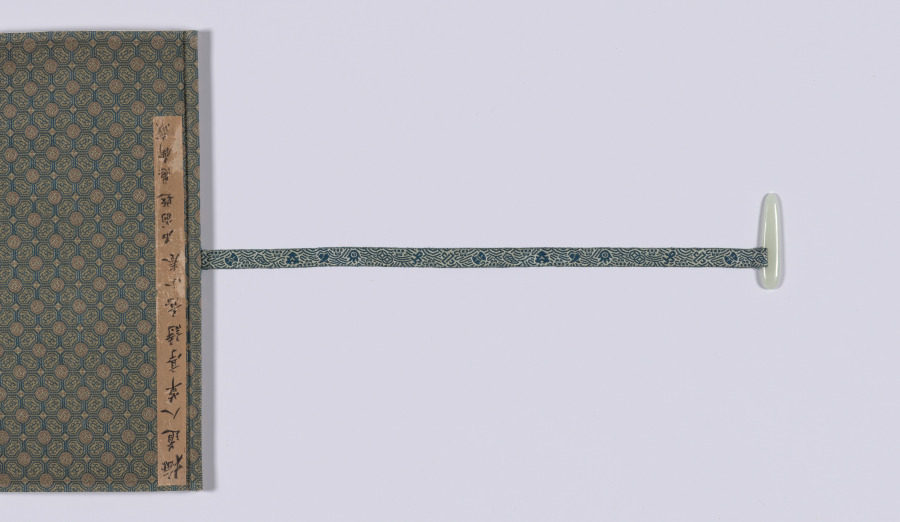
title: Poetic Feeling in a Thatched Pavilion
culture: China, Yuan dynasty (1271-1368)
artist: Wu Zhen (Chinese, 1280–1354)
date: 1347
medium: handscroll; ink on paper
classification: Painting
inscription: 依村構草亭，端方意匠宏。 林深禽鳥樂，塵遠竹松輕。 泉石俱延賞，琴書悅性情。 何當謝凡近，任適慰平生。 至正七年丁亥冬十月，為元澤戲作草亭詩意。梅沙彌書 [印]楳華盦; 嘉興吳鎮仲圭書畫記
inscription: 我愛梅花翁，巨老傳心印。 脩此水墨缘，種種得蒼潤。 樹石墮筆鋒，造化不能吝。 而今橡林下，我願執掃汛。 後學沈周 [印]启南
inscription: Colophon by Chen Rentao (1952): 予求梅道人畫二十年不可得。所見多膺鼎，即故宮所藏山水數軸都不可靠。傳世真迹，惟《漁父圖》、《嘉禾八景》與此《草亭詩意》而已。壬辰十月十四日余大病初愈，居家休養，研山師忽持此圖相贈。展卷披覽，頓覺精神沛振，如服僊藥。同日又得宋拓柳公權《神策軍紀聖德碑》，及群玉堂藏《真草書千(字)文》，皆海內孤本。一日得數寶，欣喜何如，書以志幸。 陳仁濤識 [印]陳氏仁濤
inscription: Colophon by Chen Rentao: 此圖作於至正七年丁亥，時年六十八，盖其晚年神品也。 濤又識 [印]陳仁濤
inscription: Title on frontispiece by Li Dongyang 李東陽 (1447-1516).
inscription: 33 additional seals: 1 seal of Li Chao-heng 李肇亨 (1592-1664)：檇李李肇亨書畫記; 9 seals of Liang Qingbiao 梁清標 (1620-1691): 蒼巖子、蕉林、蕉林梁氏書畫之印、蕉林秘玩、蕉林書屋、蕉林玉立氏圖書、棠邨 (appears twice)、棠邨審定; 1 seal of Wang Yirong (1845-1900): 懿榮; 3 seal of Li Yanshan (1898-1961): 雙銕笛樓 (appears twice)、硯山心賞; 12 seals of Chen Rentao 陳仁濤（1906-1968）：陳氏仁濤、陳仁濤珍藏印、金匱寶藏·陳氏仁濤 (appears three times)、金匱秘笈、金匱室、金匱室精鑒璽 (appears twice)、金匱室主、金匱神品、仁濤奇緣; 1 seal: 崐溟居士; 1 seal: 林止在㭯生圖書印; 3 seals unidentified.